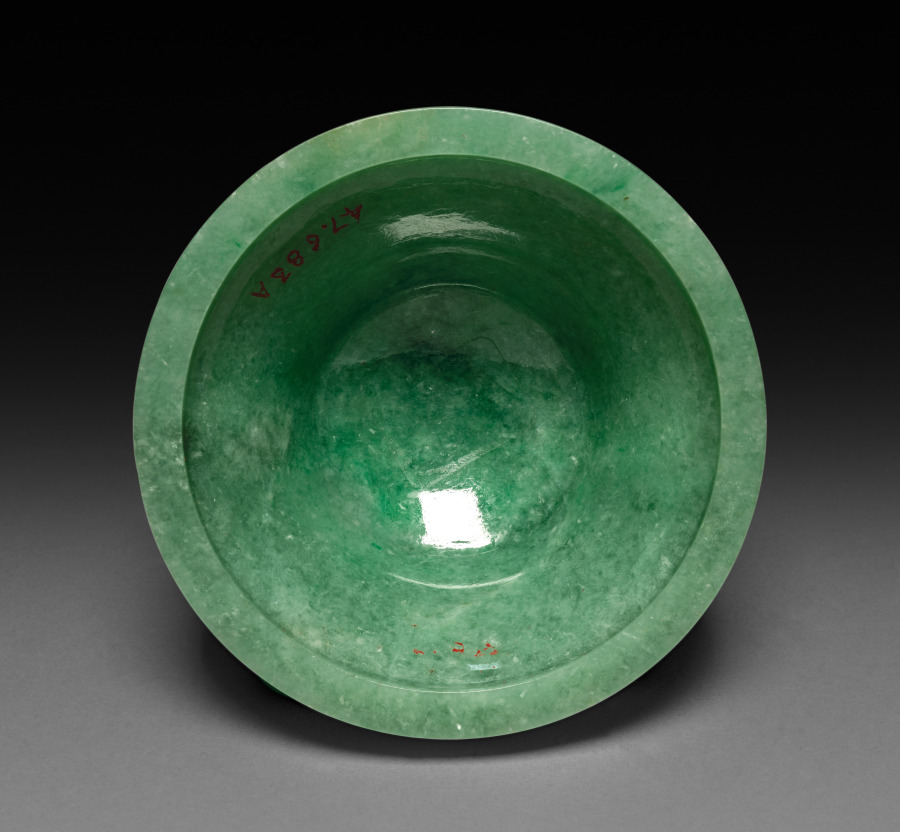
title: Three-Sectional Altar Group: Koro (lid)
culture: China, Qing dynasty (1644-1911)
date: 1644–1911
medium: jade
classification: Jade